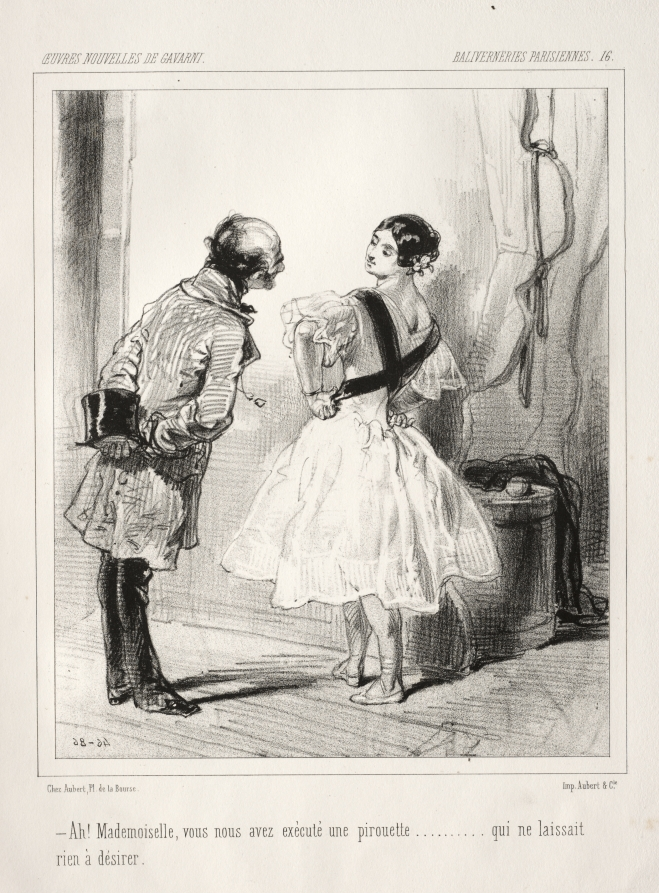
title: Baliverneries Parisiennes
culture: France, 19th century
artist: Paul Gavarni (French, 1804–1866)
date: c. 1847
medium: lithograph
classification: Print